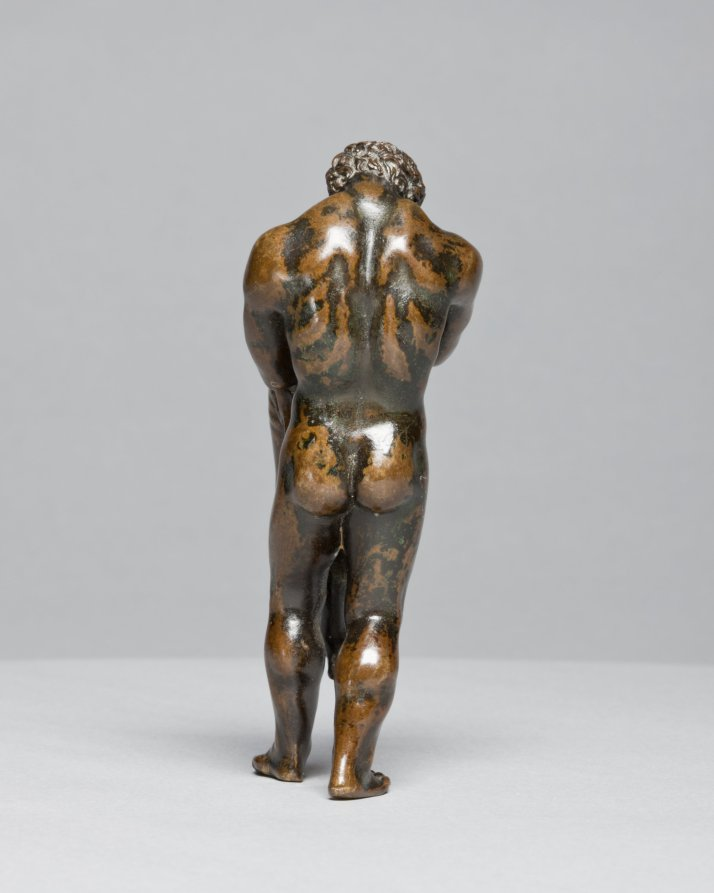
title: Hercules and the Nemean Lion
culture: Italy or France, 16th century or later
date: 1500s or later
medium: bronze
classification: Sculpture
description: The original owner of this work would have understood that this scene referred to the entire story of Hercules, the demi-god who had to accomplish twelve labors. The lion is named after the city of Nemea, near Corinth, a monstrous beast sent by the goddess Hera to wreak havoc on the area. After killing the lion, Hercules wore his pelt, commonly seen in other representations of the hero.